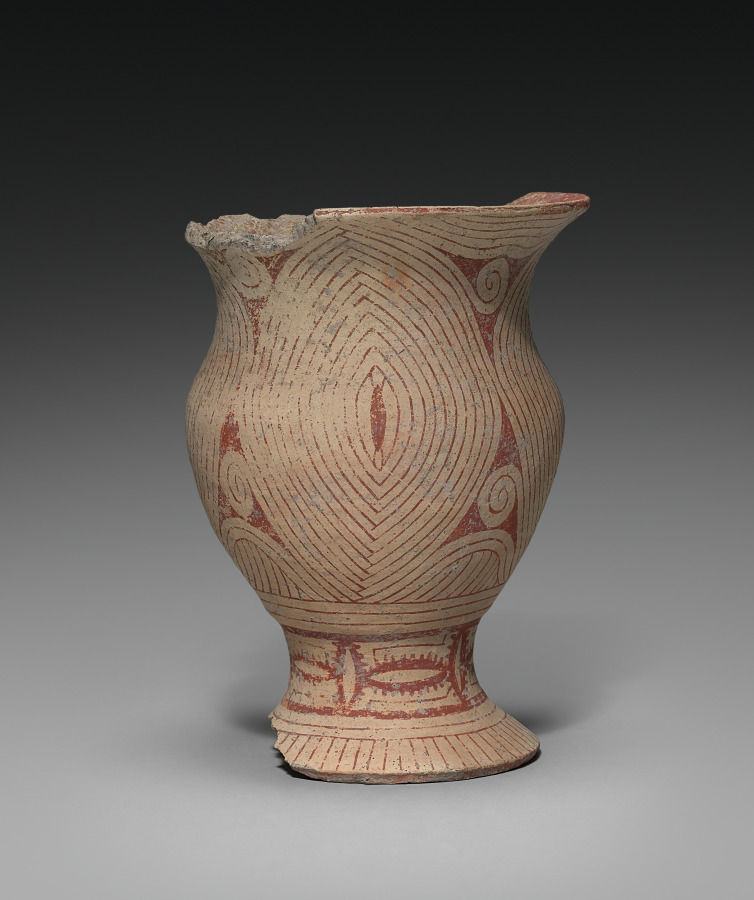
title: Jar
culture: Thailand, Ban Chiang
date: 300 BCE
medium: earthenware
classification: Ceramic